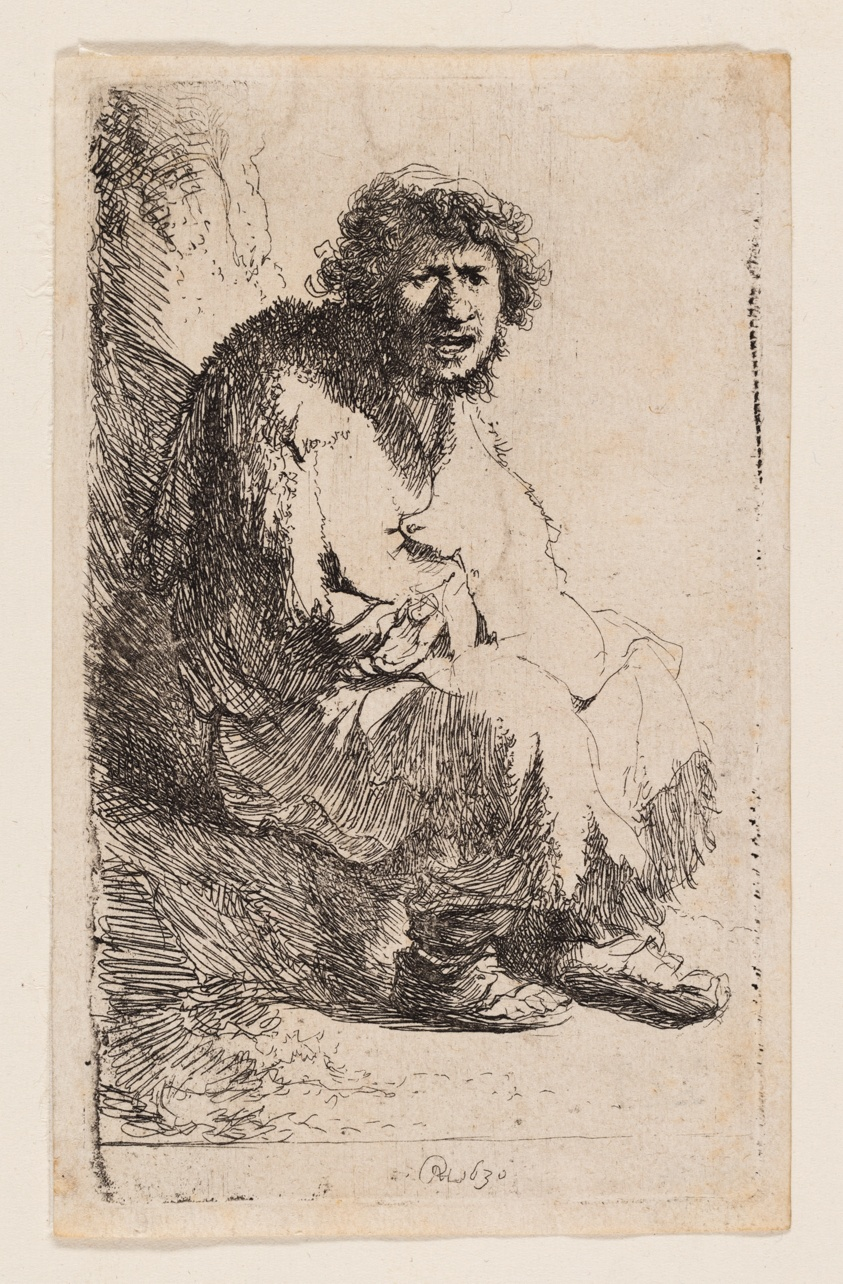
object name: Print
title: Beggar Seated on a Bank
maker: Rembrandt van Rijn (Dutch, 1606-1669)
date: 1630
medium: Etching on ivory laid paper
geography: Holland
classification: etching; print; prints and drawing; paper